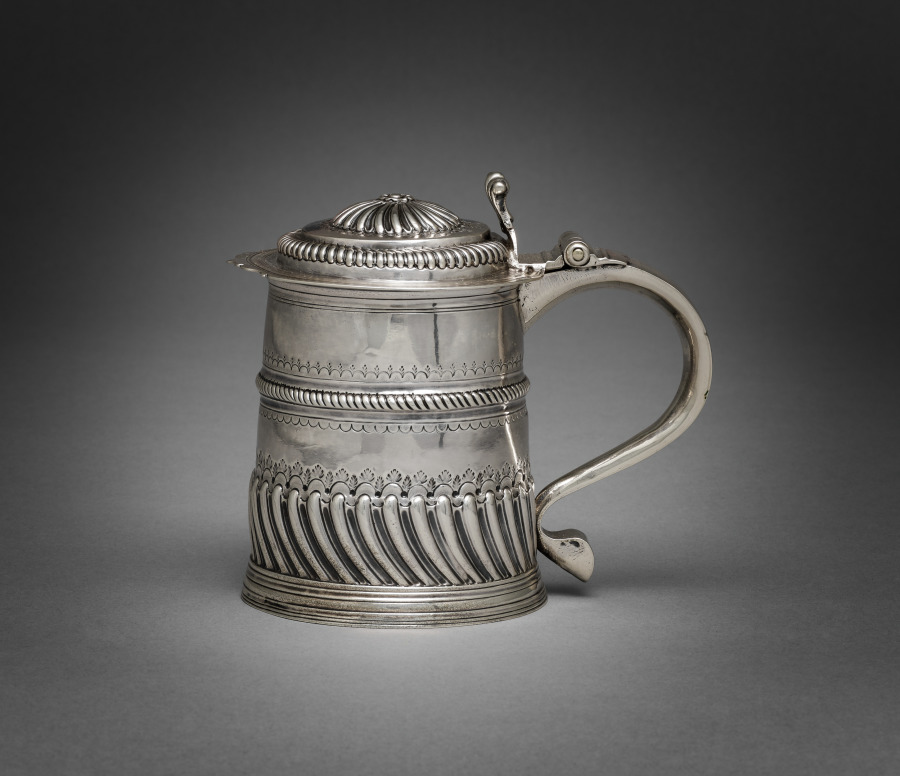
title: Tankard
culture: England, London, early 18th Century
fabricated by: Thomas I Parr (British)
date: 1701–1702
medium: silver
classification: Silver